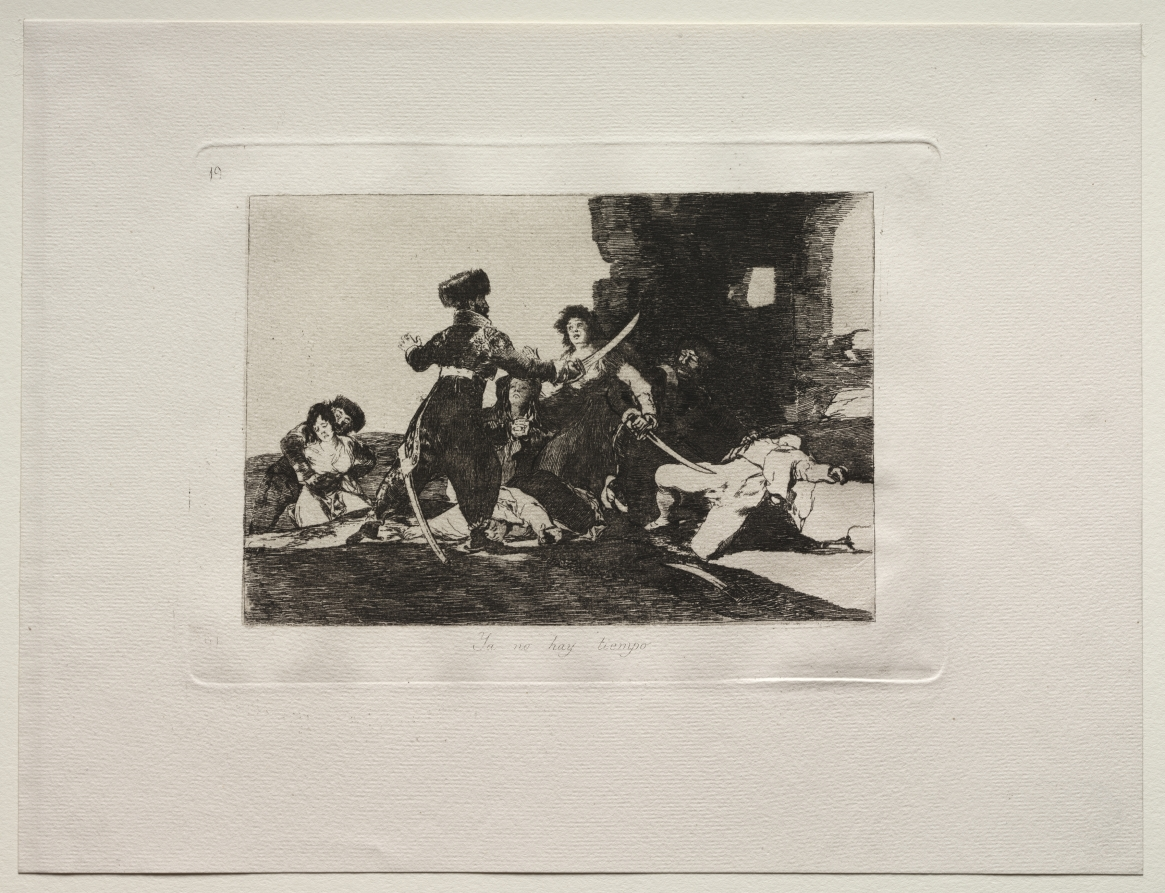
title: The Horrors of War: There Isn't Time Now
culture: Spain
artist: Francisco de Goya (Spanish, 1746–1828)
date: c. 1810–20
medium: etching and aquatint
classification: Print